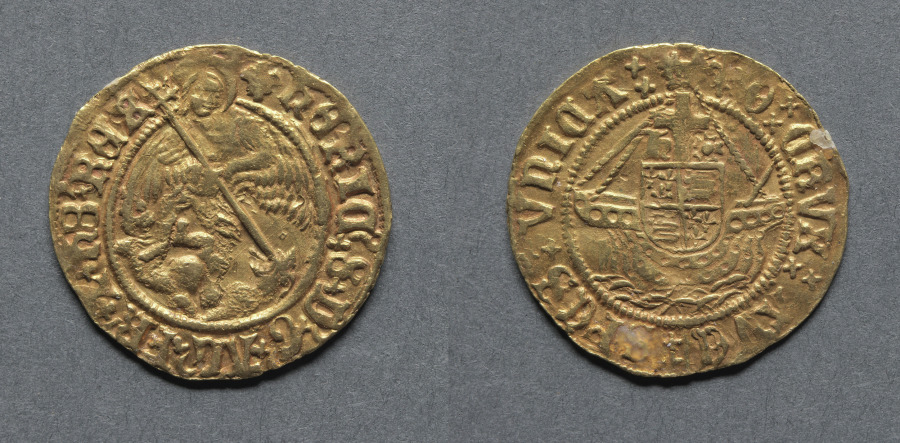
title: Half Angel: Angel Slaying a Dragon (obverse); Ship with Shield of Arms (reverse)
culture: England, Henry VIII, 1509-1547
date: 1526–44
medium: gold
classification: Coins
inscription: HENRIC 8 DG AGL FR Z HIB REX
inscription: O CRVX AVE SPES VNICA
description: During his life Henry VII had accumulated enormous wealth, and it took his son, Henry VIII, until 1542 to squander it. Henry knew the English coinage had been debased in the past and did not see why it should not be debased again, this time for his personal benefit. Full debasement began officially in 1544. The angel varied in value from 6 shillings 8 pence to 11 shillings between Edward's reign and the time of James I. During the reign of Henry VIII, it was valued at seven shillings and six pence (7/6) or 90 pence, the half angel being half that value. The angel was last produced under Charles I in 1642.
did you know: This coin takes its name from the winged angel figure, St. Michael, who is spearing the dragon.